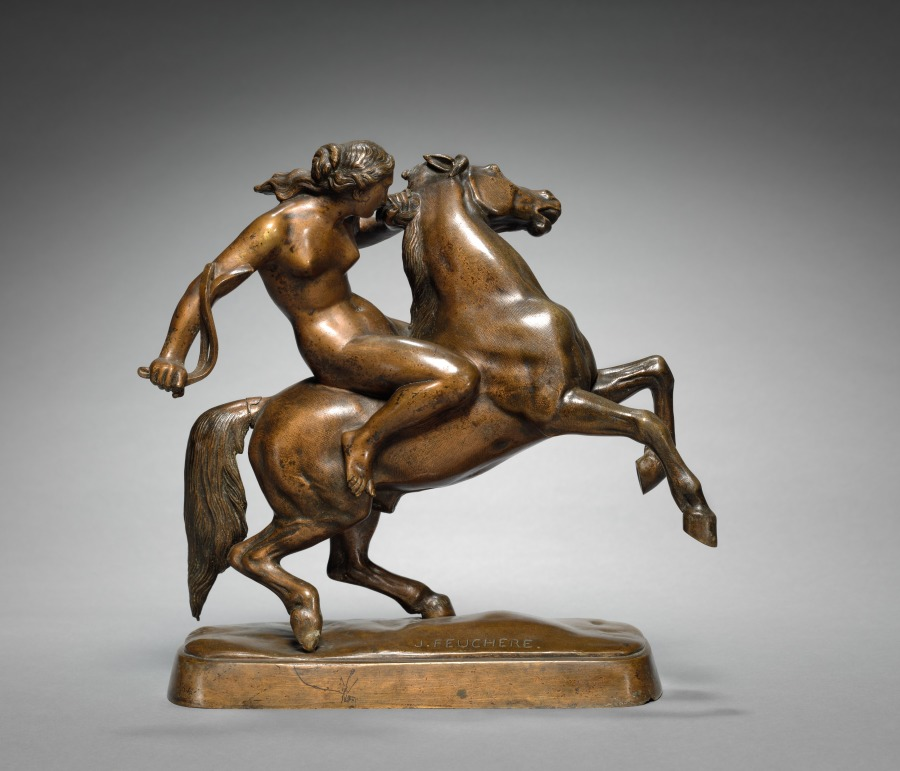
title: Amazon Taming a Horse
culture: France, 19th century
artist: Jean-Jacques Feuchère (French, 1807–1852)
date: c. 1840–1843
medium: bronze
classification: Sculpture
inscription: signed on base: "J. FEUCHÈRE"